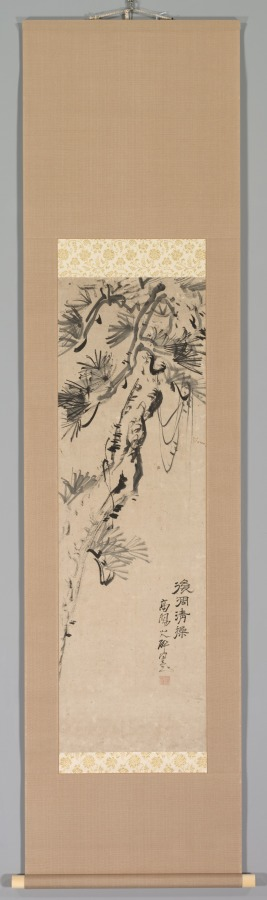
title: Aged Pine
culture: Japan, Edo period (1615–1868)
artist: Nakayama Kōyō (Japanese, 1717–1780)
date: 1717–80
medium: hanging scroll; ink on paper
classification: Painting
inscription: Artist's inscription and seal, lower right.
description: The ancient pine is an admired subject in Asian painting and symbolizes the desirable human qualities of wisdom and solid moral character.